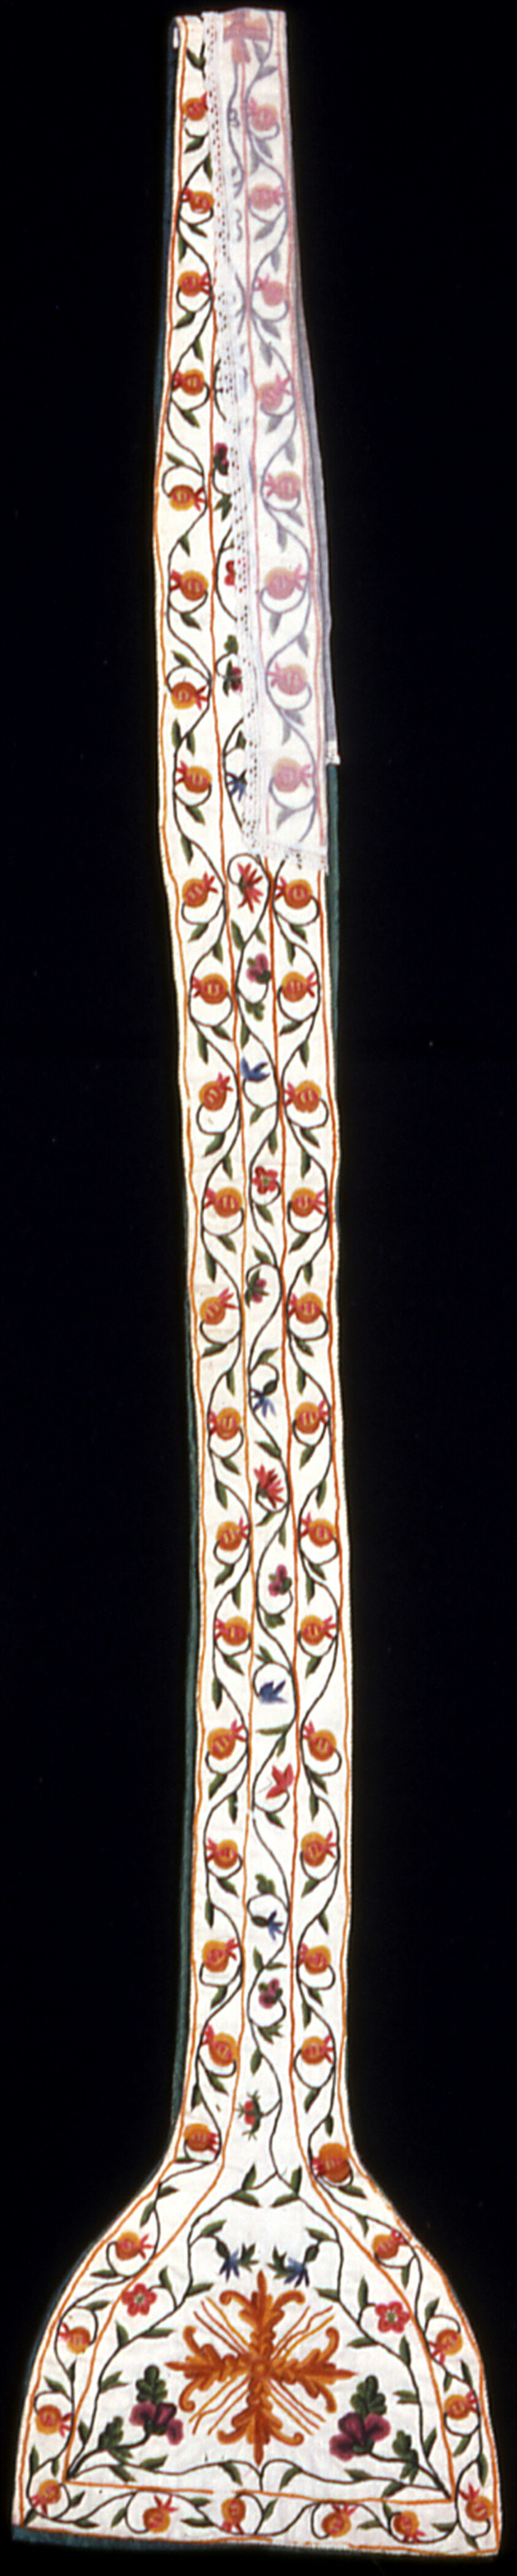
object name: Religious/Ritual Object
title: Stole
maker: France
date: c. 1750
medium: Wool, 2:2 twill weave; embroidered with wool, in chain stitches and French knots; collar of cotton, plain weave with knitted edge; lined with linen, plain weave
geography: France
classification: textile; needlework (visual works); liturgical; ritual objects